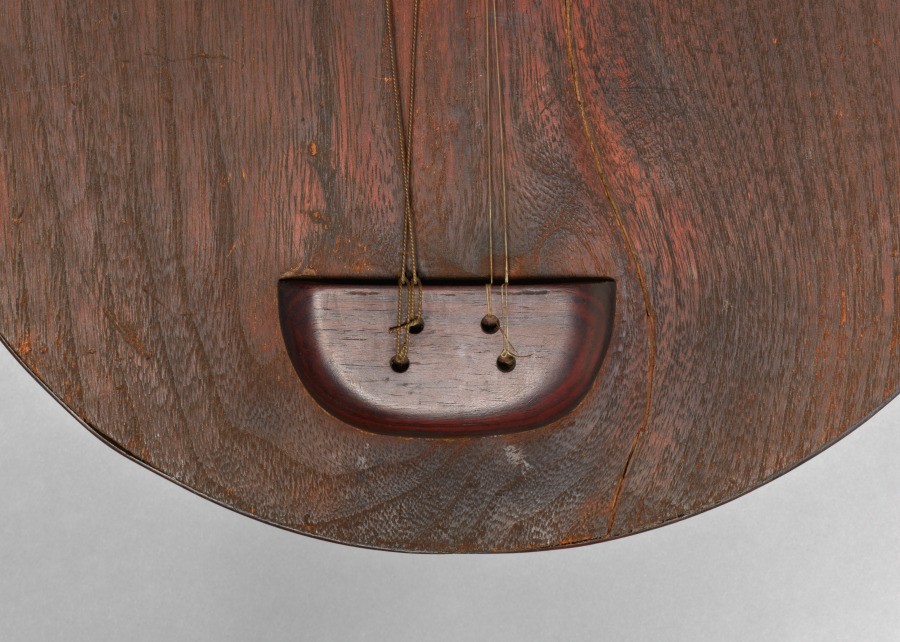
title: Moon Lute (Yueqin)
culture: China, Qing dynasty (1644-1911)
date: 1800s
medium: Rosewood, wutong (paulownia) wood, and gut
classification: Musical Instrument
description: Its resemblance to the full moon (yue 月) gives the yueqin its name. Found in popular ensembles, the Beijing and folk (jingxi) operas and used to accompany song, the yueqin has only recently been embraced by the modern Chinese orchestra. The player presses the strings between the frets making chord playing difficult but giving increased control over the timbre and intonation. Strings are plucked with fingernails or a pick using up-and-down strokes and tremolo techniques that sustain and provide color to a tone. It is known as gekkin in Japan.